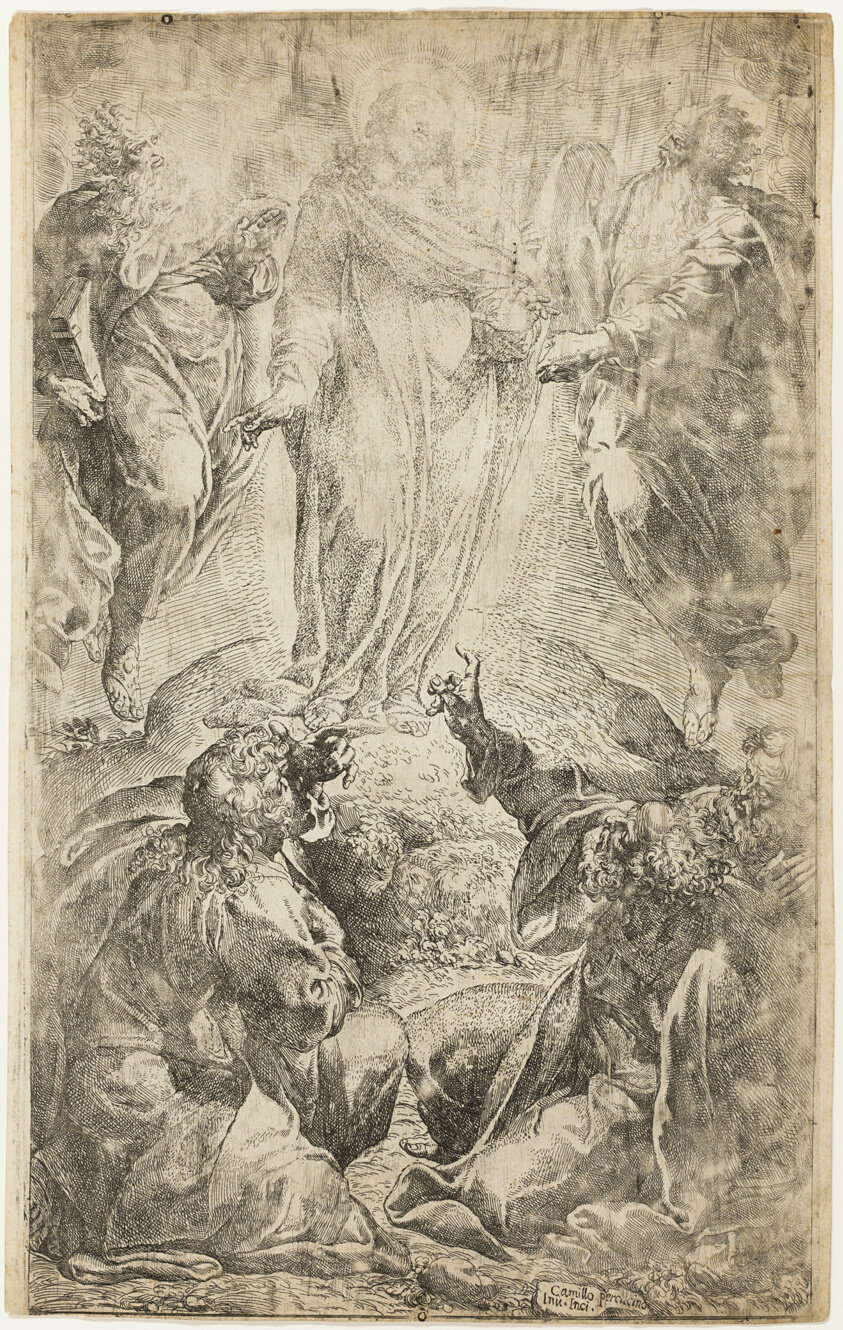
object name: Print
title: The Transfiguration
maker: Camillo Procaccini (Italian, 1555-1629)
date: c. 1590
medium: Etching in black on cream laid paper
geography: Italy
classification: etching; print; prints and drawing